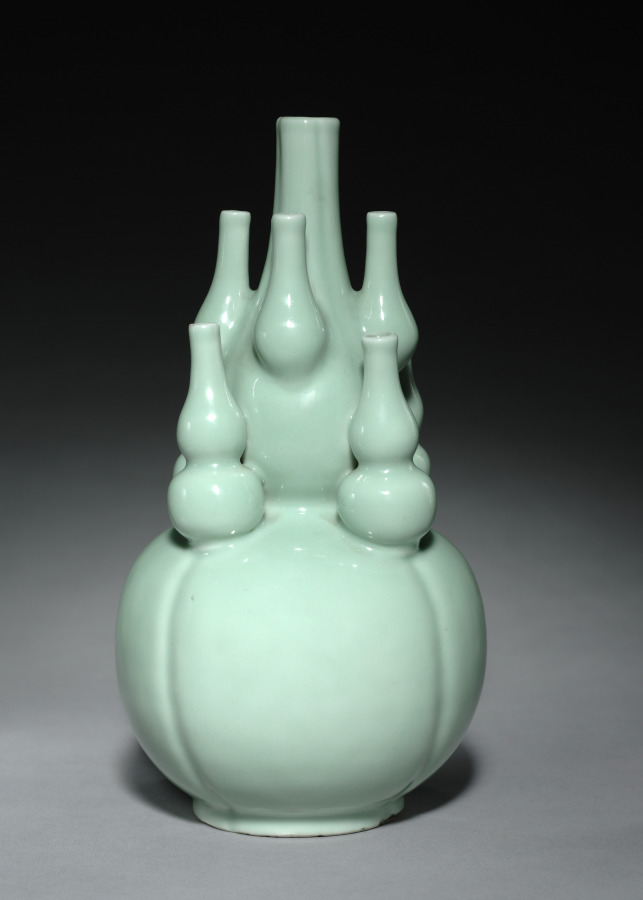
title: Double-gourd Shaped Bottle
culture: China, Qing dynasty (1644–1911), Qianlong mark and reign (1736–95)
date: 1736–95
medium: porcelain with celadon glaze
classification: Ceramic